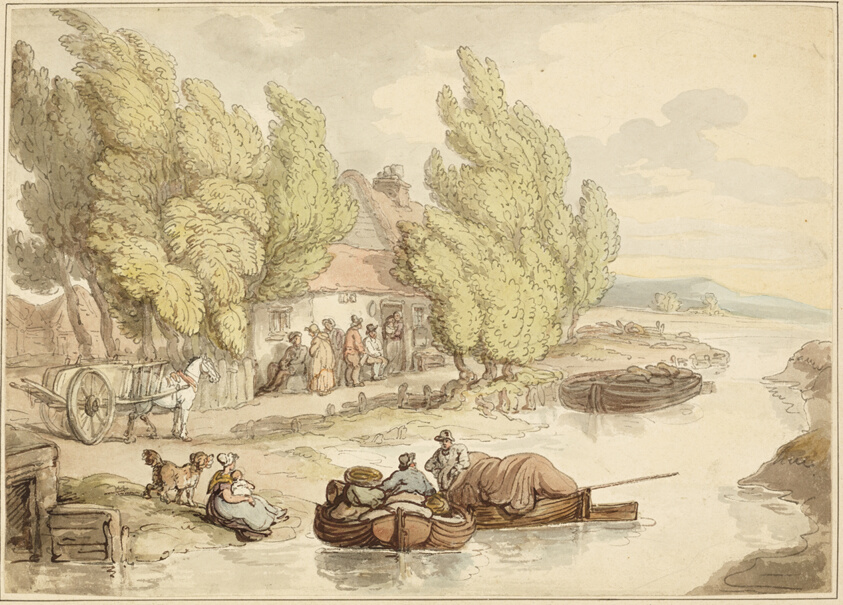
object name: Drawing and Watercolor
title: Village on the River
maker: Thomas Rowlandson (English, 1756-1827)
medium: Pen and brown and gray ink with brush and watercolor, over graphite, on ivory wove paper, laid down on tan wove paper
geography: England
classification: watercolor; drawings (visual works); prints and drawing